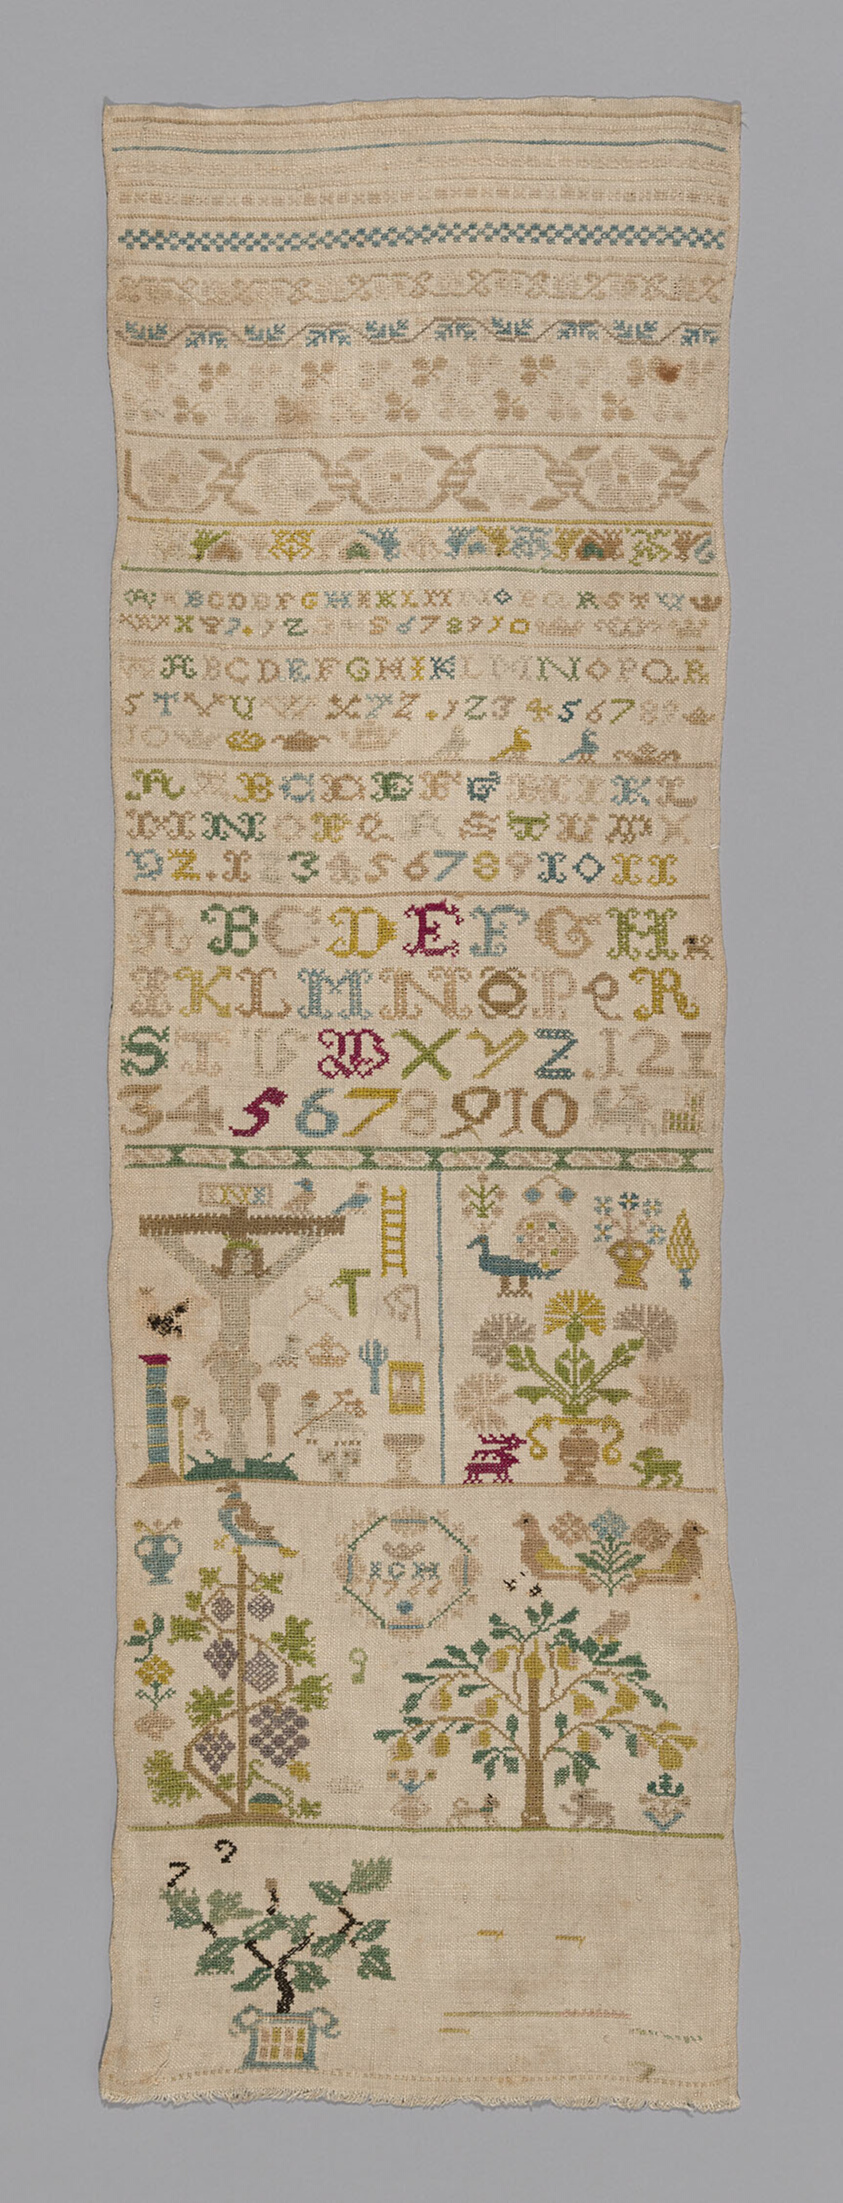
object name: Textile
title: Sampler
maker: Germany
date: 1766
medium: Linen, plain weave; embroidered with silk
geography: Germany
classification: textile; needlework (visual works); sampler